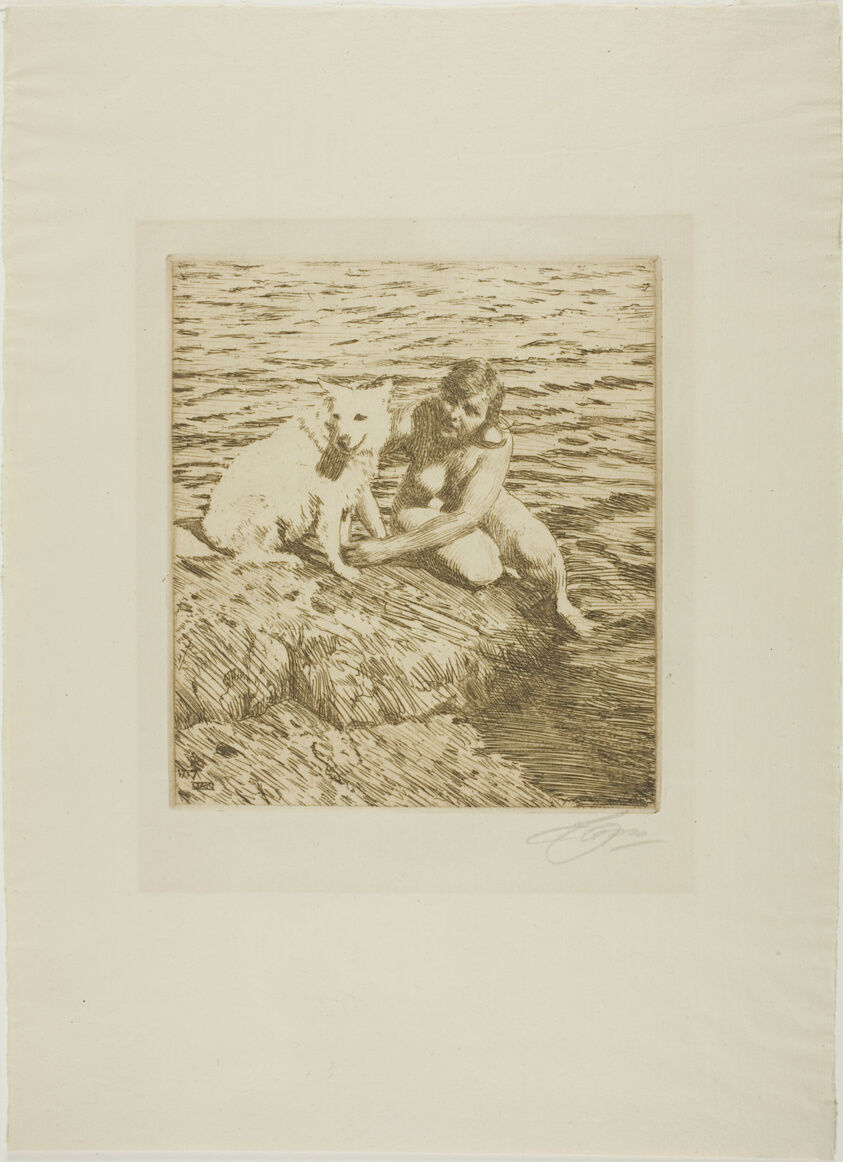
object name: Print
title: Sappo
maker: Anders Zorn (Swedish, 1860-1920)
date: 1917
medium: Etching in brown ink on cream laid paper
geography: Sweden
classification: etching; print; prints and drawing